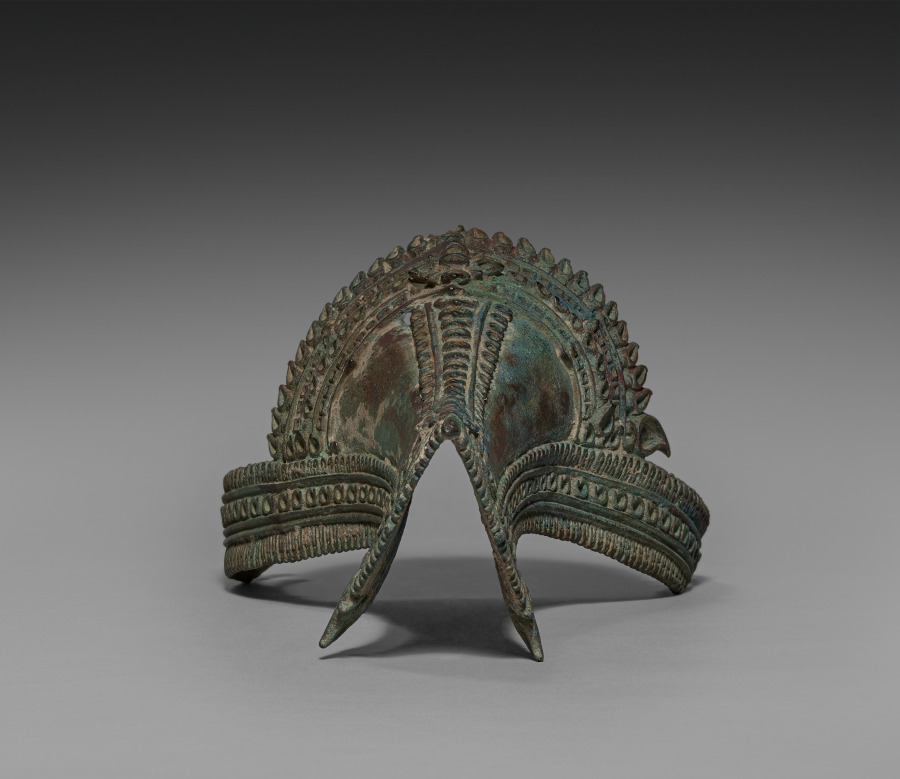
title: Sheath for ritual conch shell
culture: Cambodia, Khmer, Angkor period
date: 1100s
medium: shell and bronze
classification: Sculpture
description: A royal temple like Banteay Chhmar was built for performing rituals and to honor images of gods, Buddhas, and other sacred or enlightened beings for the sake of the kingdom’s protection and ongoing prosperity. Conch shells were blown at the start of rituals to make the sound corresponding to the syllable om. The dancing figure of Hevajra, a Buddhist being of enlightenment with eight heads, sixteen arms, and four legs, has been worked into the bronze embellishment of the shell. Hevajra was elevated to a prominent position in Khmer Buddhism of the Angkorian period as the standard figure denoting the practice of rituals prescribed in a text called the Hevajra-tantra. The tripod stand with three serpents is probably not original to the shell.